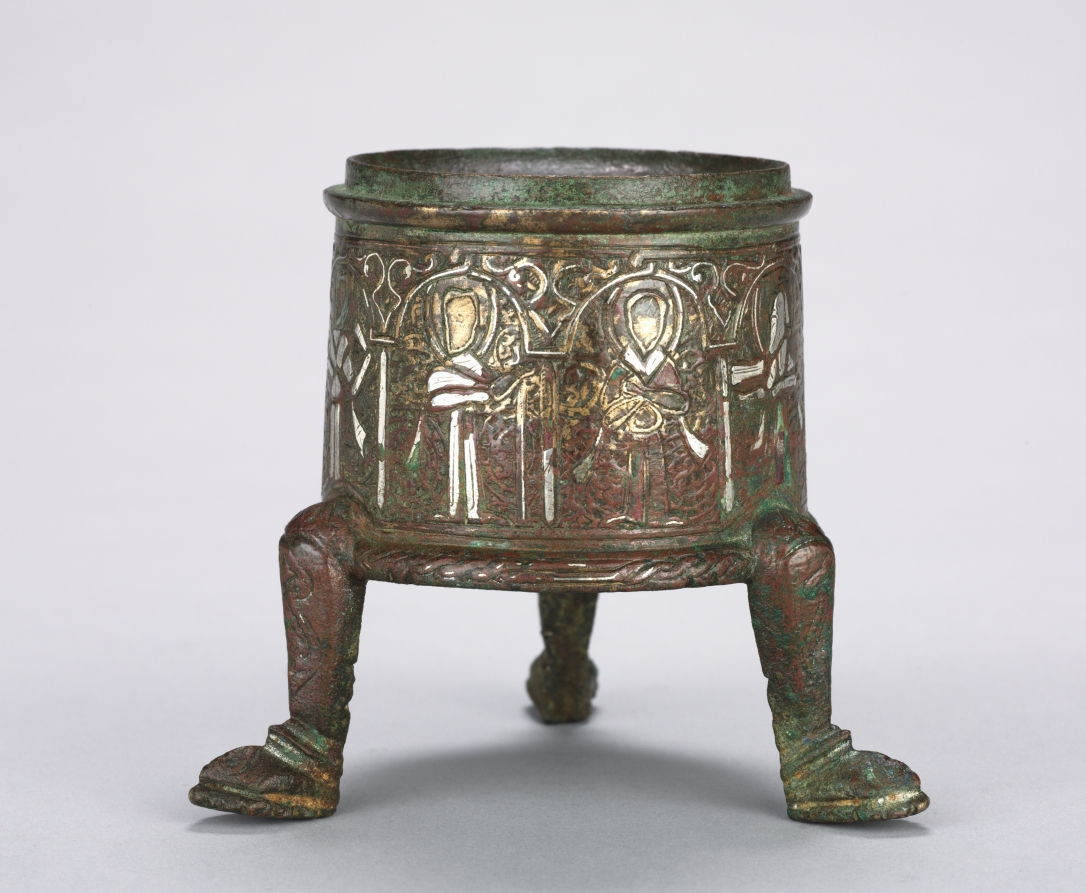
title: Incense Burner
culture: Syria, Ayyubid Period, 13th Century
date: 1200–1250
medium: brass inlaid with silver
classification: Metalwork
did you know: This footed vessel is wearing shoes.